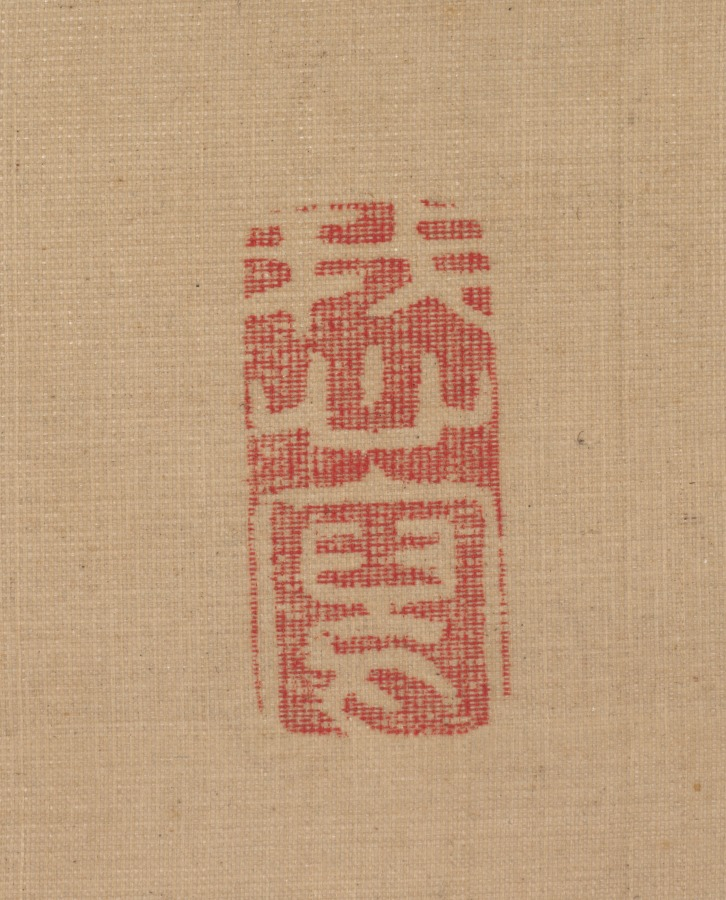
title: Vase of Flowers with Grasshopper, Marine Life, and Garden Rock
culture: Japan, Meiji period (1868–1912)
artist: Okabe Ko (Japanese)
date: late 1800s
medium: hanging scroll; ink and color on silk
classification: Painting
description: A great interest in Western scientific studies developed in Japan during the late Edo period (1615-1868) and into the Meiji era (1868-1912). One outcome of this phenomenon in the visual arts was the detailed portrayal of plant, animal, and marine life. This painting is an assemblage of objects carefully observed from nature, but not usually seen together.